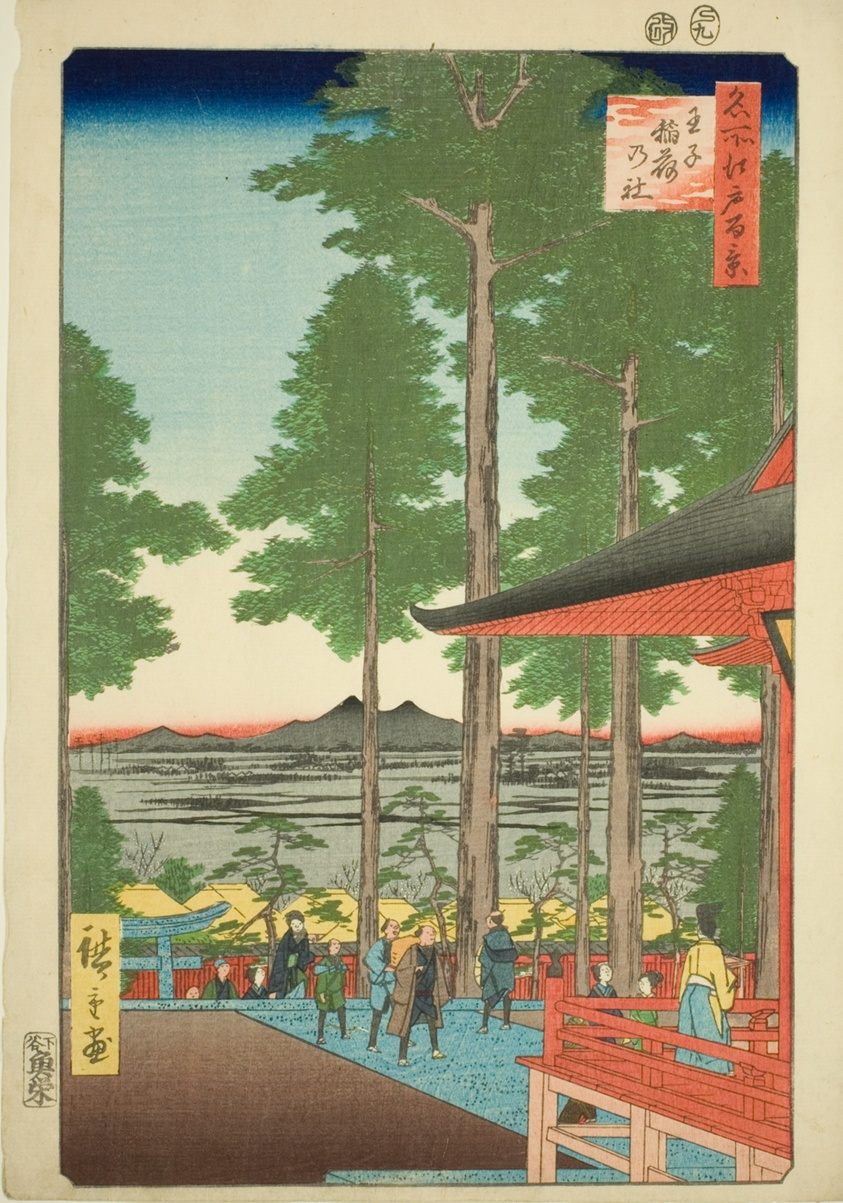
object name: Print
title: Oji Inari Shrine (Oji Inari no yashiro), from the series “One Hundred Famous Views of Edo (Meisho Edo hyakkei)”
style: Japanese (culture or style)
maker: Utagawa Hiroshige 歌川 広重; Japanese, 1797-1858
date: 1857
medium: Color woodblock print; oban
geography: Japan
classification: woodblock print; print; asian art